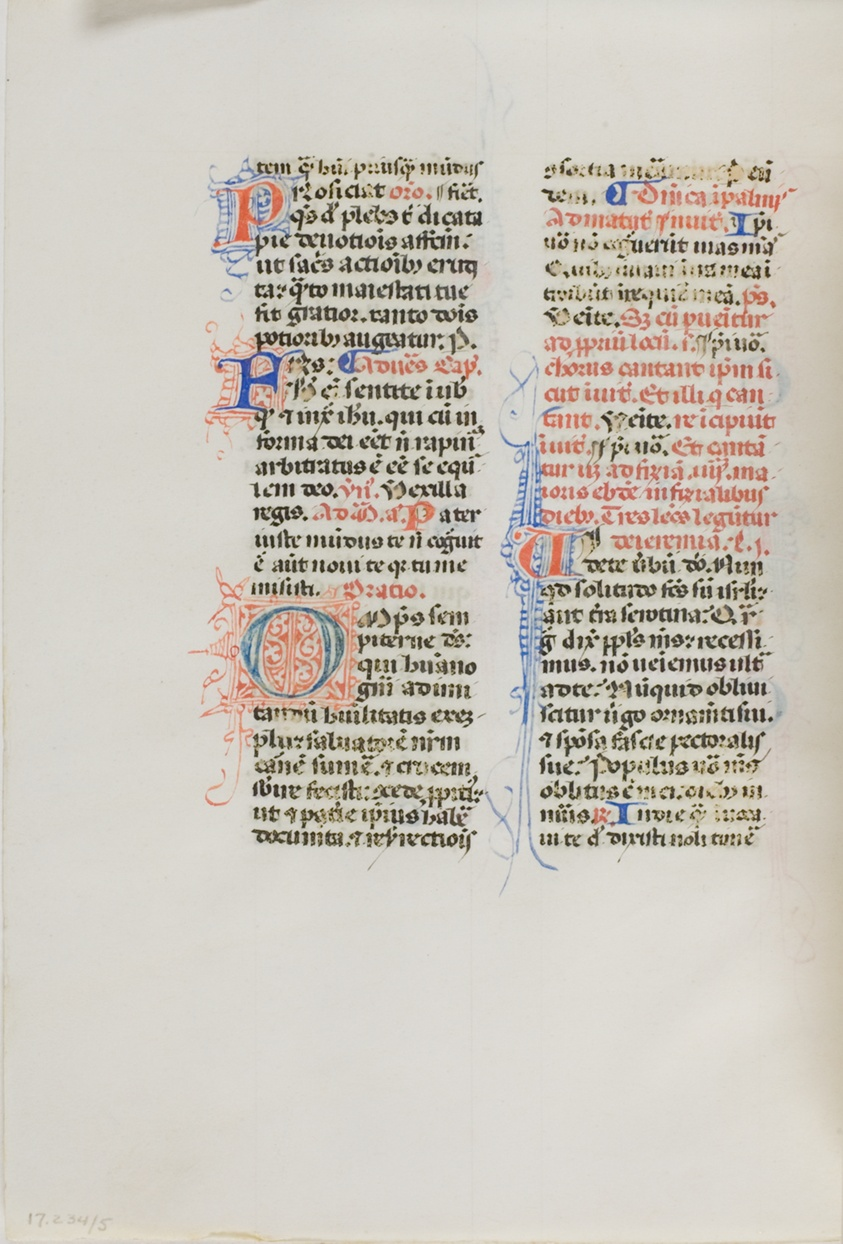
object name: Drawing and Watercolor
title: Illuminated Manuscript Leaf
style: medieval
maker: Italian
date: c. 1450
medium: Manuscript cutting with round gothic inscriptions in black, red and blue inks, and decorations in red and blue inks, on vellum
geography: Italy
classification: pen and ink drawings; manuscript; drawings (visual works); prints and drawing